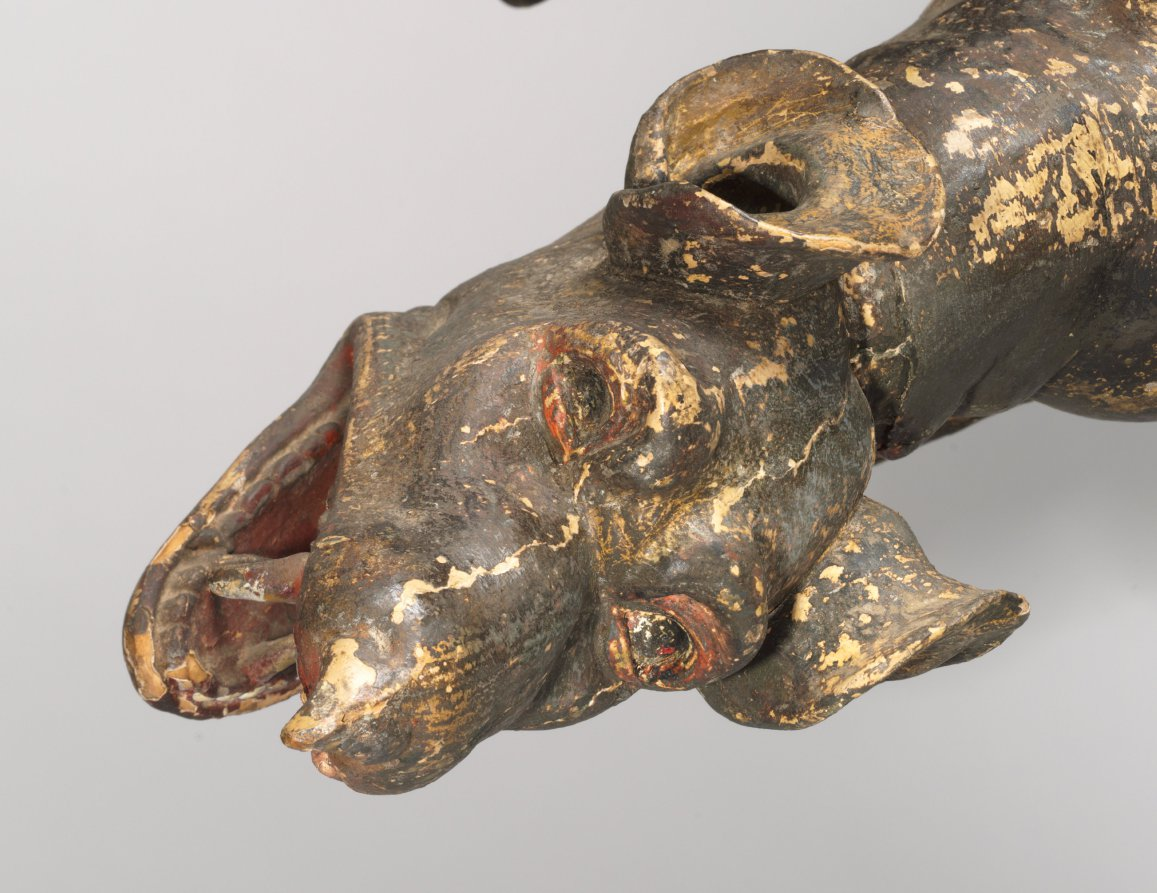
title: Saint George and the Dragon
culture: South Germany or Austria, late 17th century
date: late 1600s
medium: painted and gilded wood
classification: Sculpture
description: Saint George, a Roman soldier martyred for his Christian faith, is best known for slaying a fearsome dragon that terrorized the city of Silene, in Libya. George offered to kill the monster if residents of the city convert to Christianity. Here, George stands triumphantly over the dragon, writhing as it dies. The artist deliberately incorporated features intended to make his figure seem more familiar: the dragon seems more canine than reptilian, while George wears armor from the recent past and bears almost portrait-like facial features.